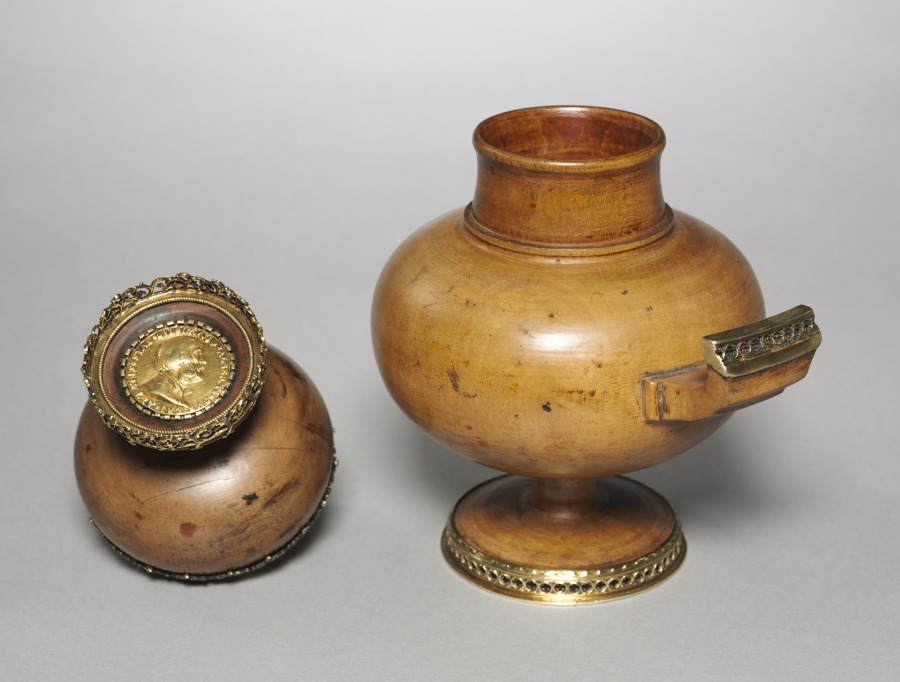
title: Double Cup (Mazer)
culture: Germany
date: c. 1530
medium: maple wood with gilt-silver mounts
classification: Wood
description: A characteristic form of drinking vessel made of close-grained wood, especially maple, was developed in Germany as early as the thirteenth century. It consisted of a larger cup with a foot and a handle and a smaller cup on top. The upper one served as a lid but could also be removed and used as a separate drinking vessel. In this example the smaller upper cup is inset with a memorial portrait medallion of Albrecht Dürer made in the year of his death, 1528. The medal is the work of Matthes Gebel who was active in Nuremberg and Augsburg as a medallist from 1523 to his death in 1574. The reverse of the medal is set into the base of the larger lower cup.